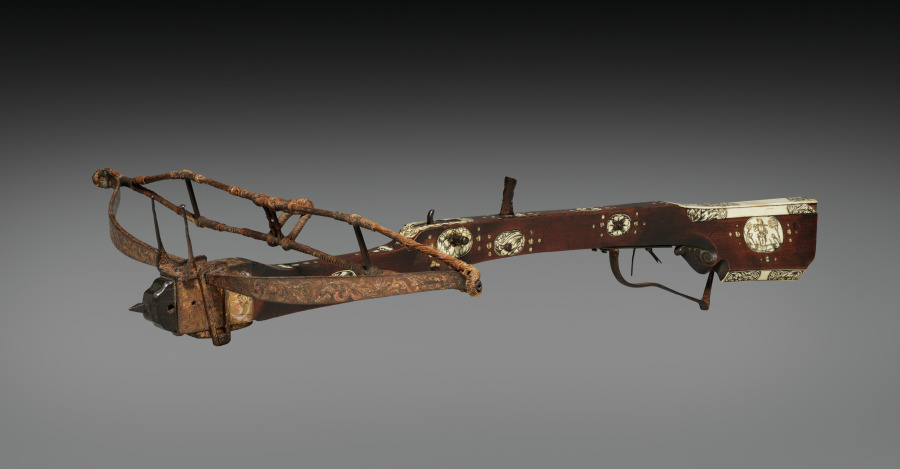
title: Pellet Crossbow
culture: Germany (?)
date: 1600s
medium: wood, inlaid with stag horn; flax cord; steel with traces of paint and gilding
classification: Arms and Armor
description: This ornate pellet crossbow is designed to fire molded clay pellets or small rocks, giving it the name stonebow. The bow is hand drawn and used for hunting small game.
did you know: This is a custom-made crossbow combining popular Italian and German designs of the 1600s.